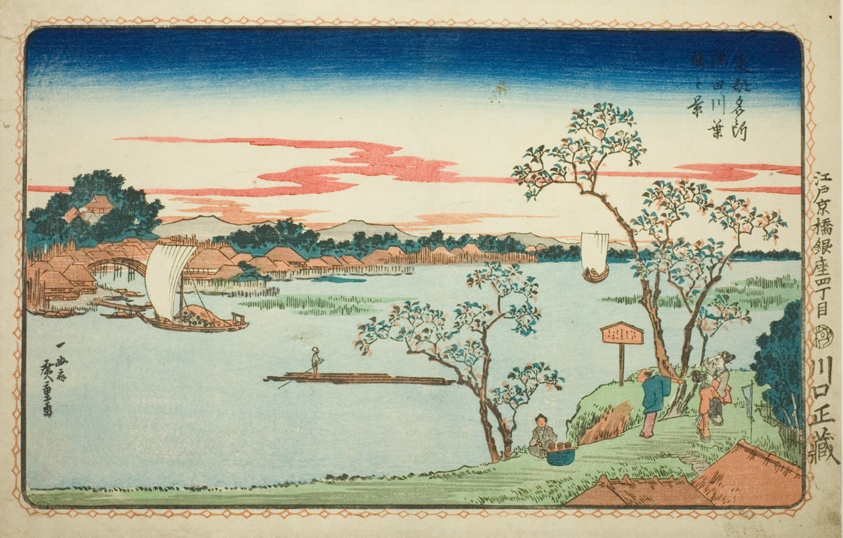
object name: Print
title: View of Leafy Cherry Trees along the Sumida River (Sumidagawa hazakura no kei), from the series "Famous Views of the Eastern Capital (Toto Meisho)"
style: Japanese (culture or style)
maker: Utagawa Hiroshige 歌川 広重; Japanese, 1797-1858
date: c. 1831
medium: Color woodblock print; oban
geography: Japan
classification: woodblock print; print; asian art